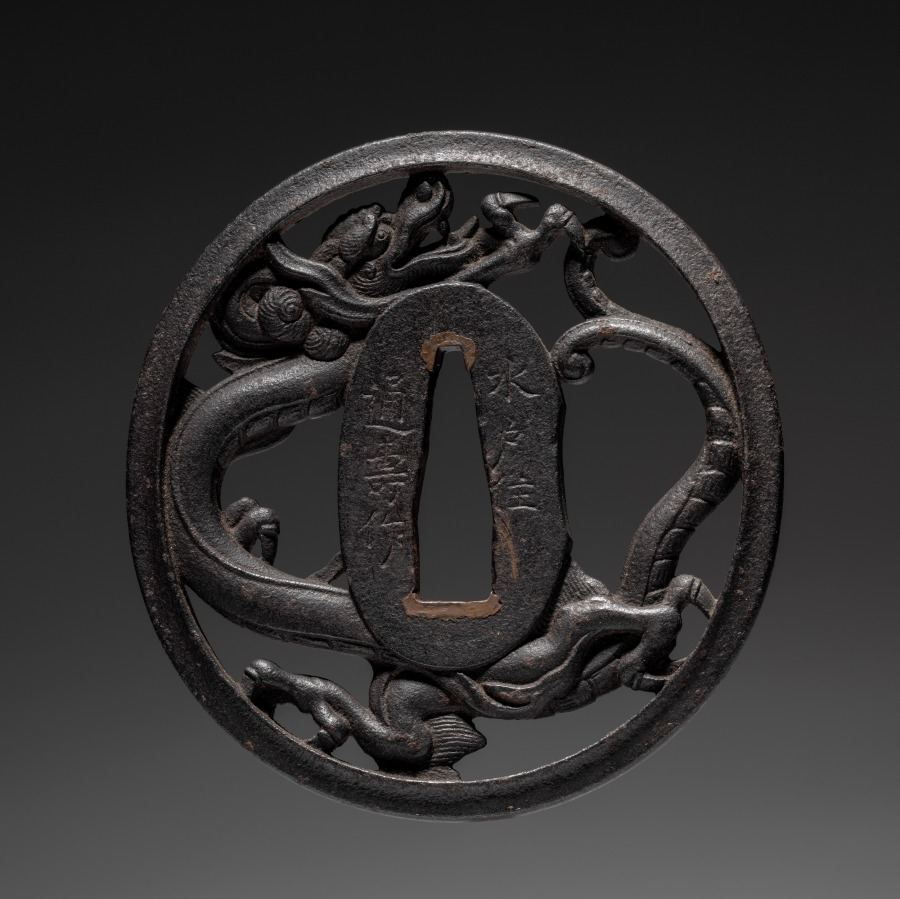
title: Sword Guard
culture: Japan, Edo period (1615–1868)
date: 1615–1868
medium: iron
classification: Arms and Armor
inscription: Signature: Tsuju (Michinaga), residing at Mito, made